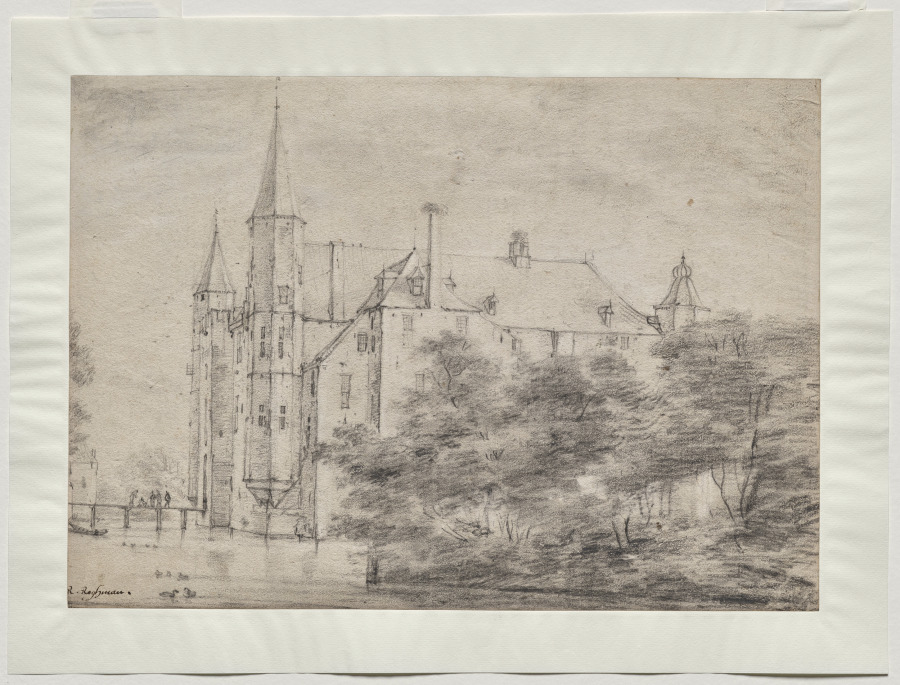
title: Zuylen Castle Near Utrecht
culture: Netherlands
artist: Roelant Roghman (Dutch, 1627–1692)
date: c. 1646–47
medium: black chalk on paper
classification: Drawing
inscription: In black ink, recto, lower left: "R. Roghman (signed)"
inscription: in black ink, recto, lower right: "Zuylen"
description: Zuijlen Castle Near Utrecht by Dutch artist Roelant Roghman is one of more than 200 drawings the artist made featuring castles, manor houses, and fortresses during a tour around the Netherlands. The artist traveled on foot to capture the present state of the buildings after a long and protracted war with Spain. He used large sheets of paper and combined ink wash and charcoal, capturing the buildings on the spot and then embellishing each with landscape elements.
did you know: In the 1640s, the artist Roelant Roghman spent two years traveling by foot and drawing manor houses, fortresses, and civic buildings throughout the Netherlands.